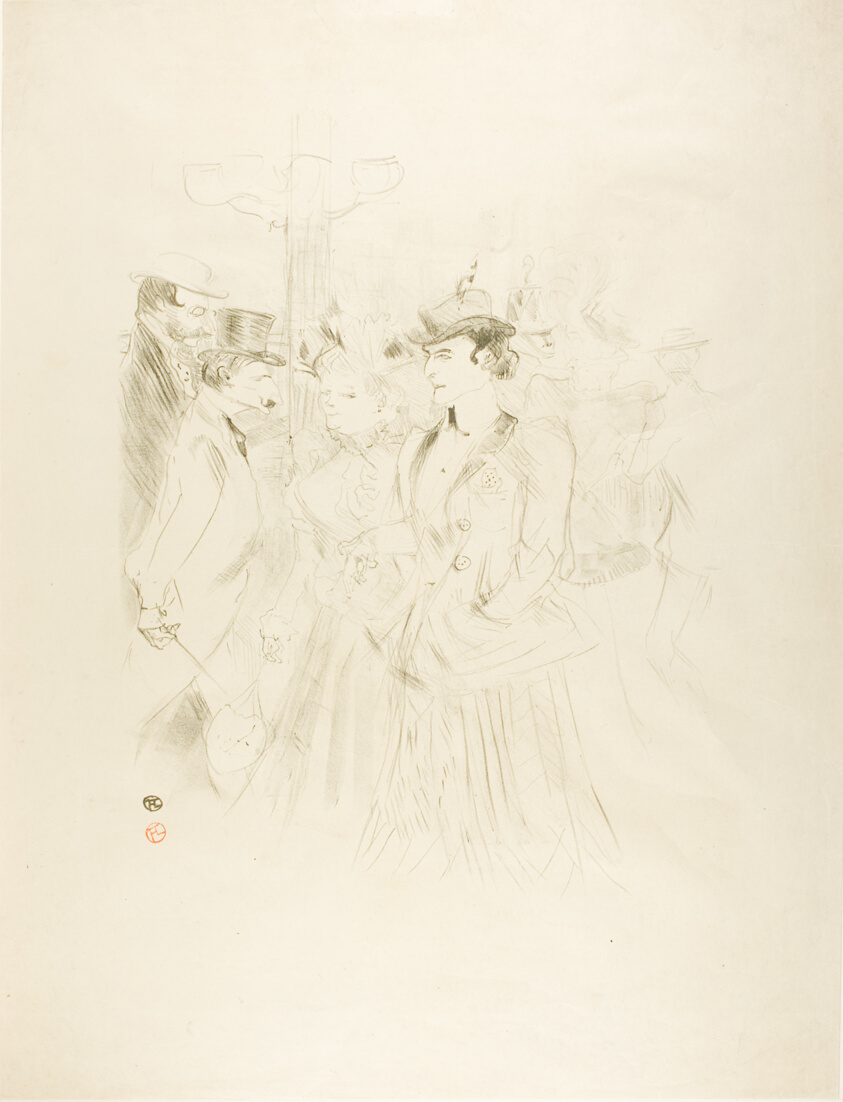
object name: Print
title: Promenade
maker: Henri de Toulouse-Lautrec (French, 1864-1901)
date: 1899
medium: Color lithograph on cream wove paper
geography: France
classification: lithograph; print; prints and drawing